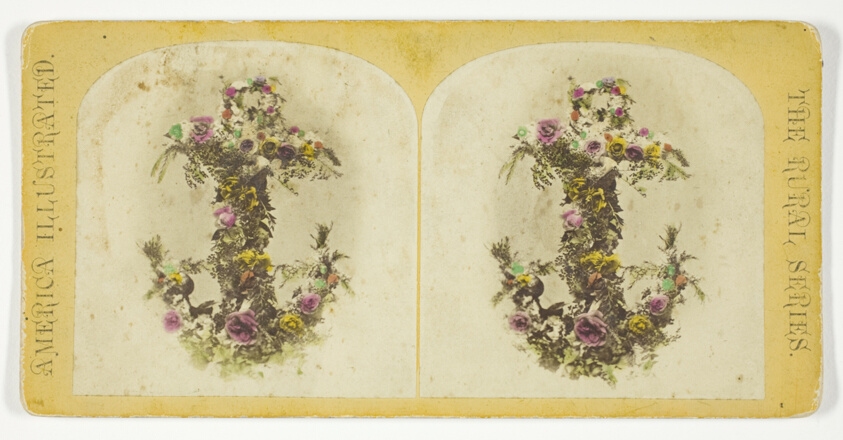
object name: Photograph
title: Untitled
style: 19th century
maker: Artist unknown; American, late 19th century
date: Late 19th century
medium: Albumen print, stereo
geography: United States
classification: photography; photograph